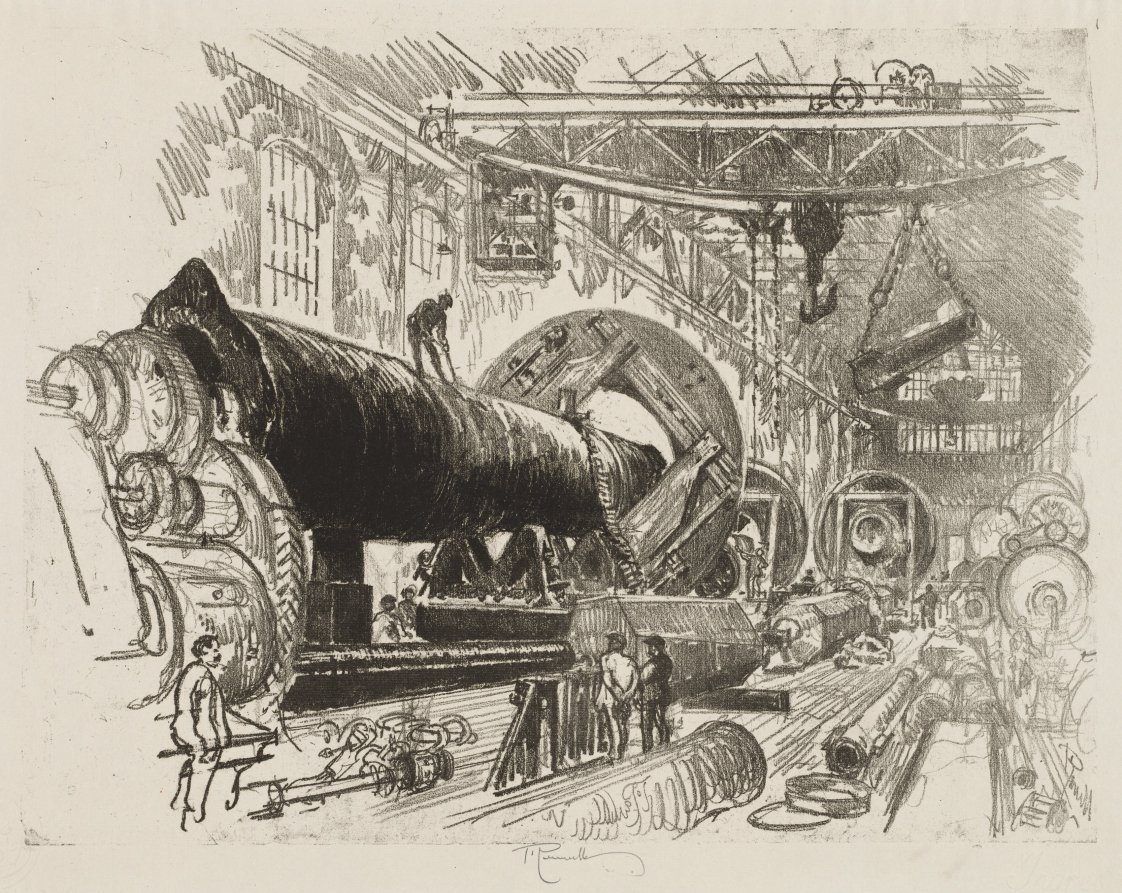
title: English War Work: Cutting and Turning a Big Gun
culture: America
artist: Joseph Pennell (American, 1857–1926)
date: 1916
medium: lithograph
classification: Print